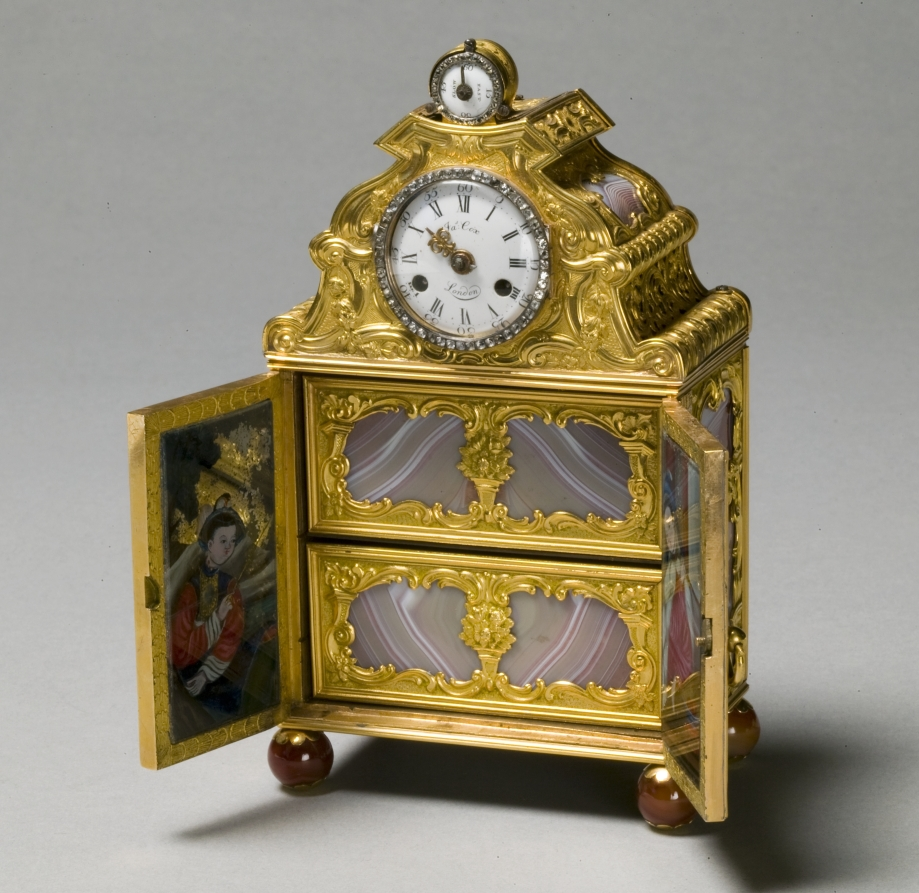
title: Cabinet Clock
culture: England, late 18th century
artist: attributed to James Cox (British)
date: c. 1770–75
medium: gold, agate, enamel dial, glass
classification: Miscellaneous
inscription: signed "Jas Cox"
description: In the 1700s and early 1800s, luxurious objects such as jewelry, miniatures, snuff boxes, and vanity cases emphasized their owner’s refinement and wealth. Especially popular were small cases with clocks and moving mechanical devices that played a handful of musical tunes. James Cox, the London goldsmith responsible for this clock and case, was known for creating such tuneful surprises, although this work no longer contains such a mechanism. Its glittering surface disguises a system based on the labor and suffering of enslaved people, whether in gold and stone mines or in shops where these goods were made by indentured apprentices. Many of these timepieces were designed for export and sold to the Chinese emperor Ch'ien Lung (1711–1799) and his court in attempt to balance out the substantial amount of tea that Britain was importing at the time.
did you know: The doors of this miniature cabinet open to reveal two small drawers that held the winding keys for the clock above.